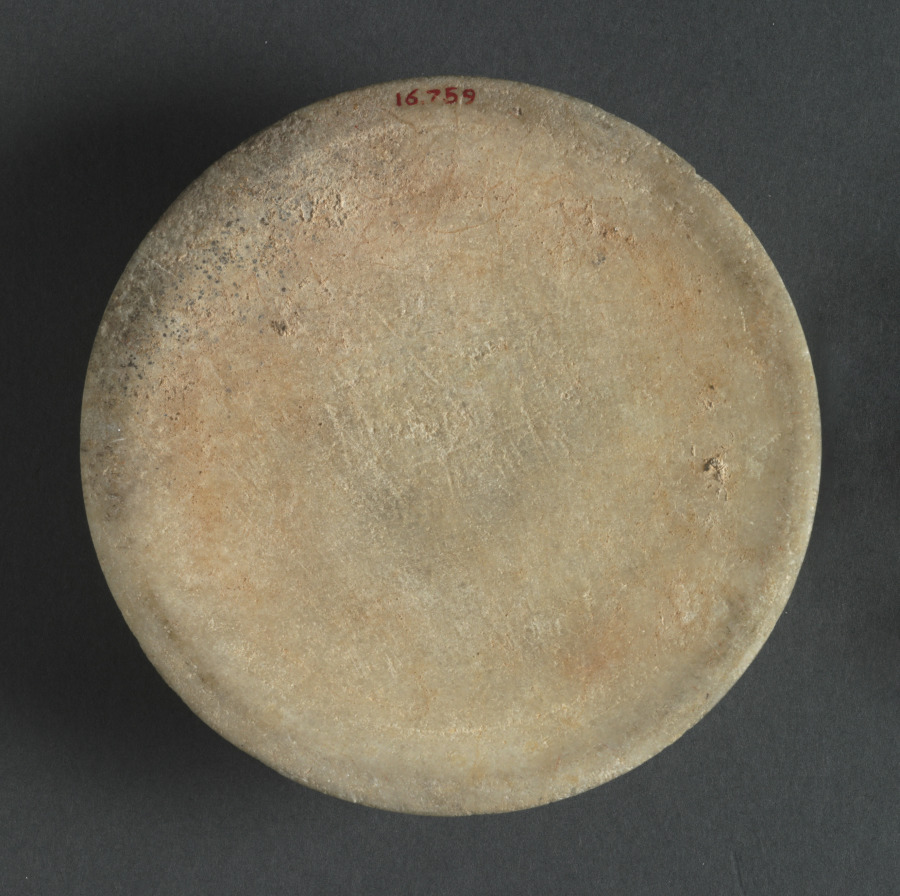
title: Pyxis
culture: Greece, Attic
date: 400–300 BCE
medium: marble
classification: Stone